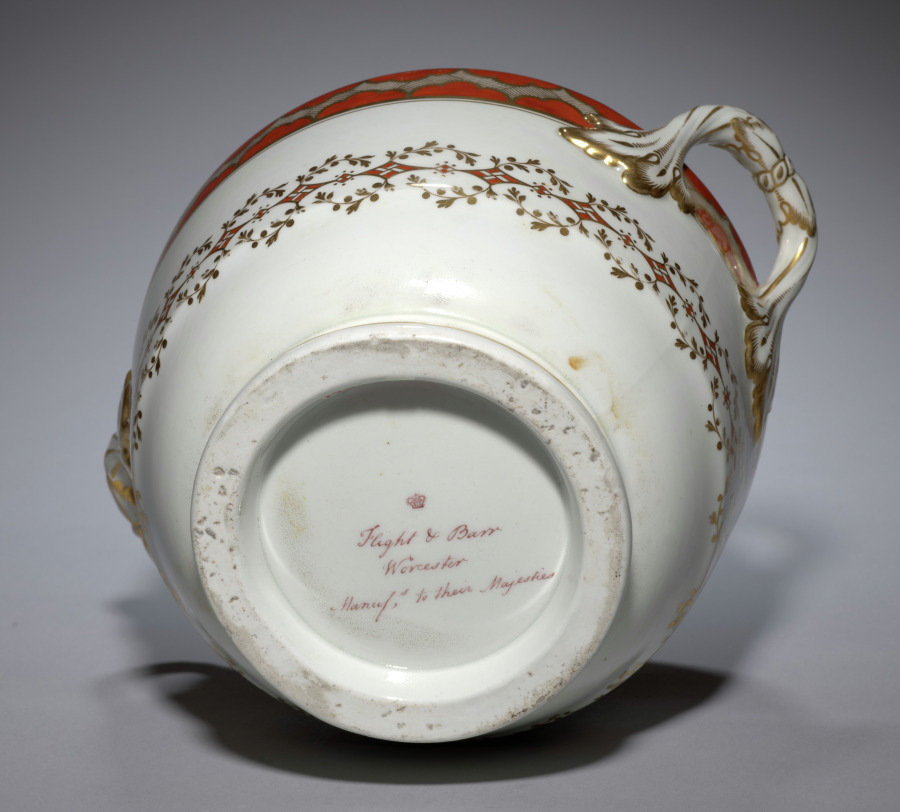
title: Ice Pail (2 of 2)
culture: England, late 18th-early 19th Century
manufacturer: Flight & Barr (British)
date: c. 1792–1804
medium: porcelain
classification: Ceramic